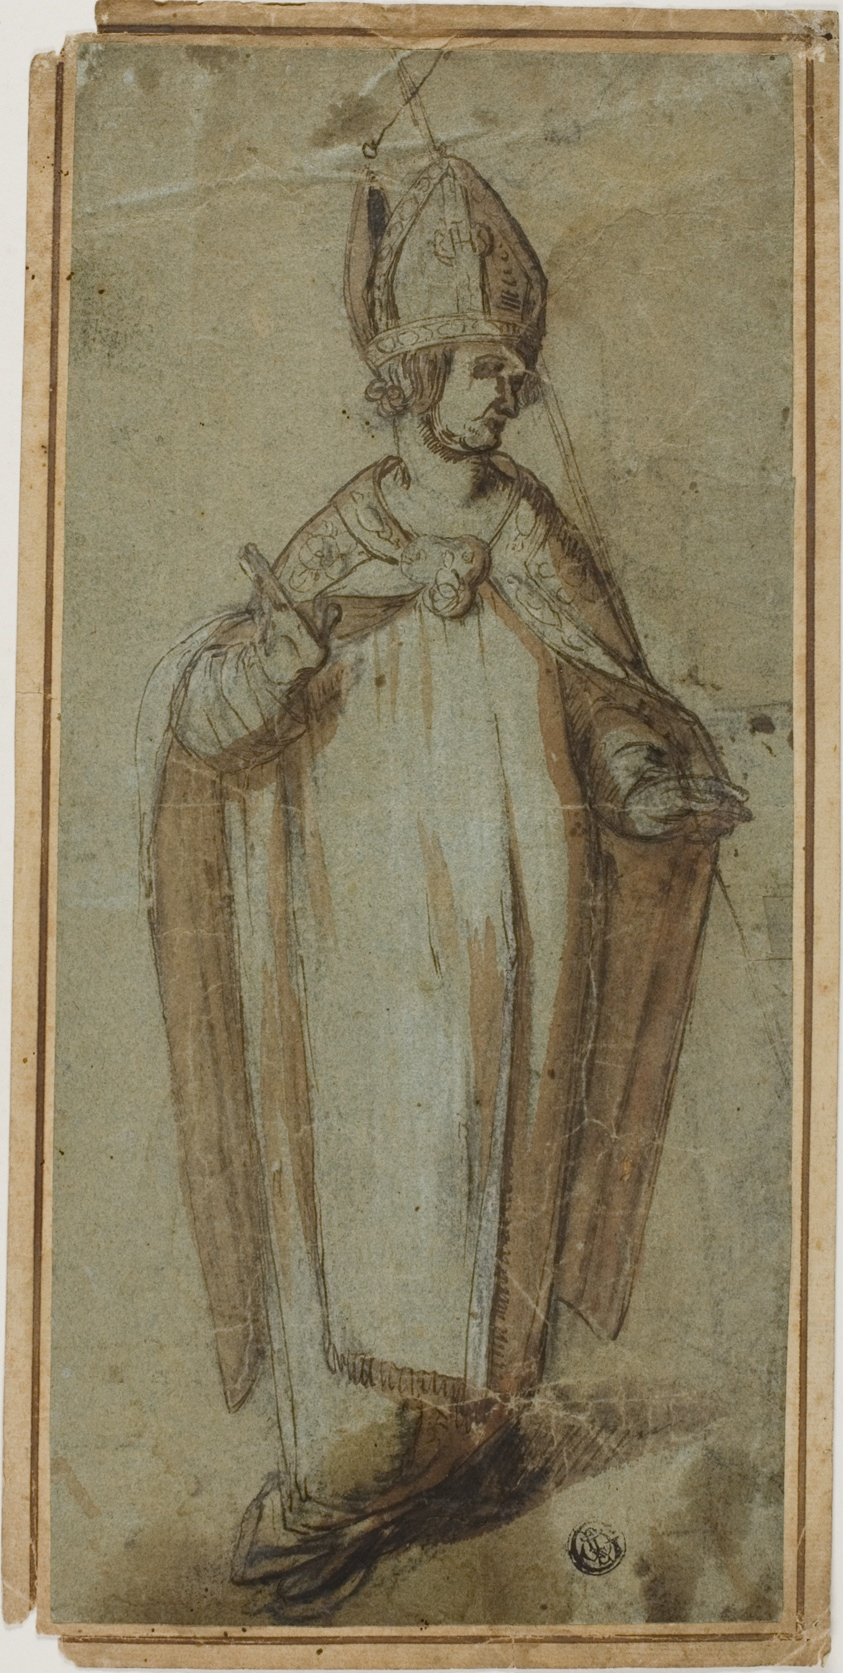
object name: Drawing and Watercolor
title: Bishop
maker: Unknown Artist; Possiby English or Dutch, 1500-1599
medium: Pen and brown ink, with brush and brown wash, heightened with lead white (discolored), over touches of black chalk, on blue laid paper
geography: England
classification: ink or chalk wash; drawings (visual works); prints and drawing